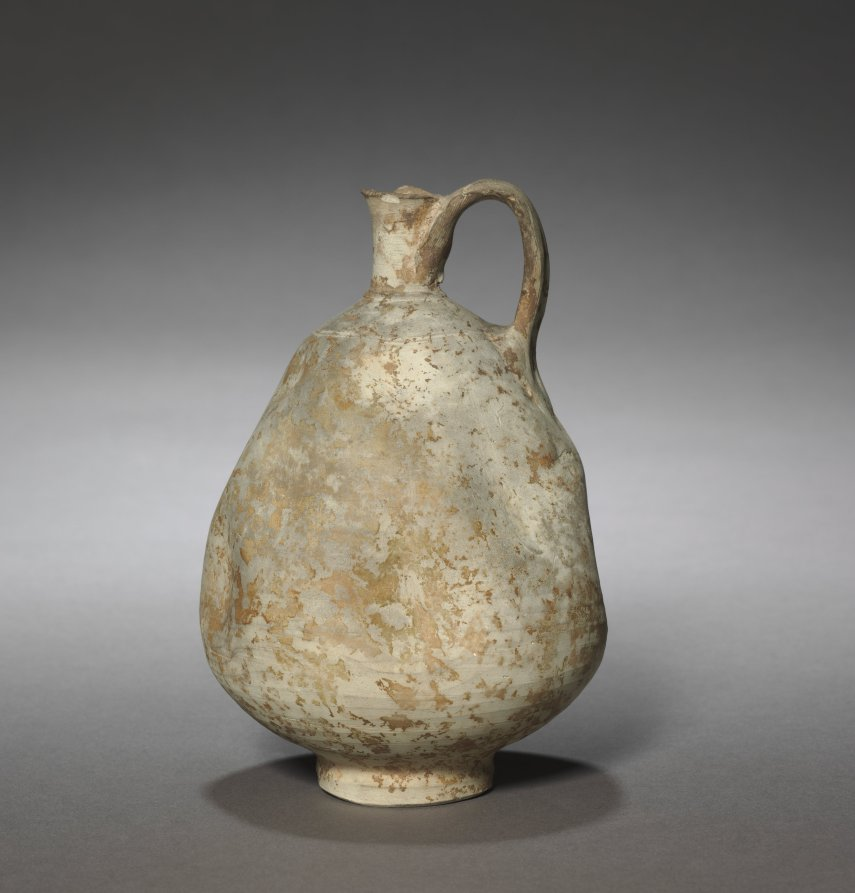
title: Jug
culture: Iran or Iraq, Seljuq period (1037–1194)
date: 1100s–1200s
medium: earthenware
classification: Ceramic